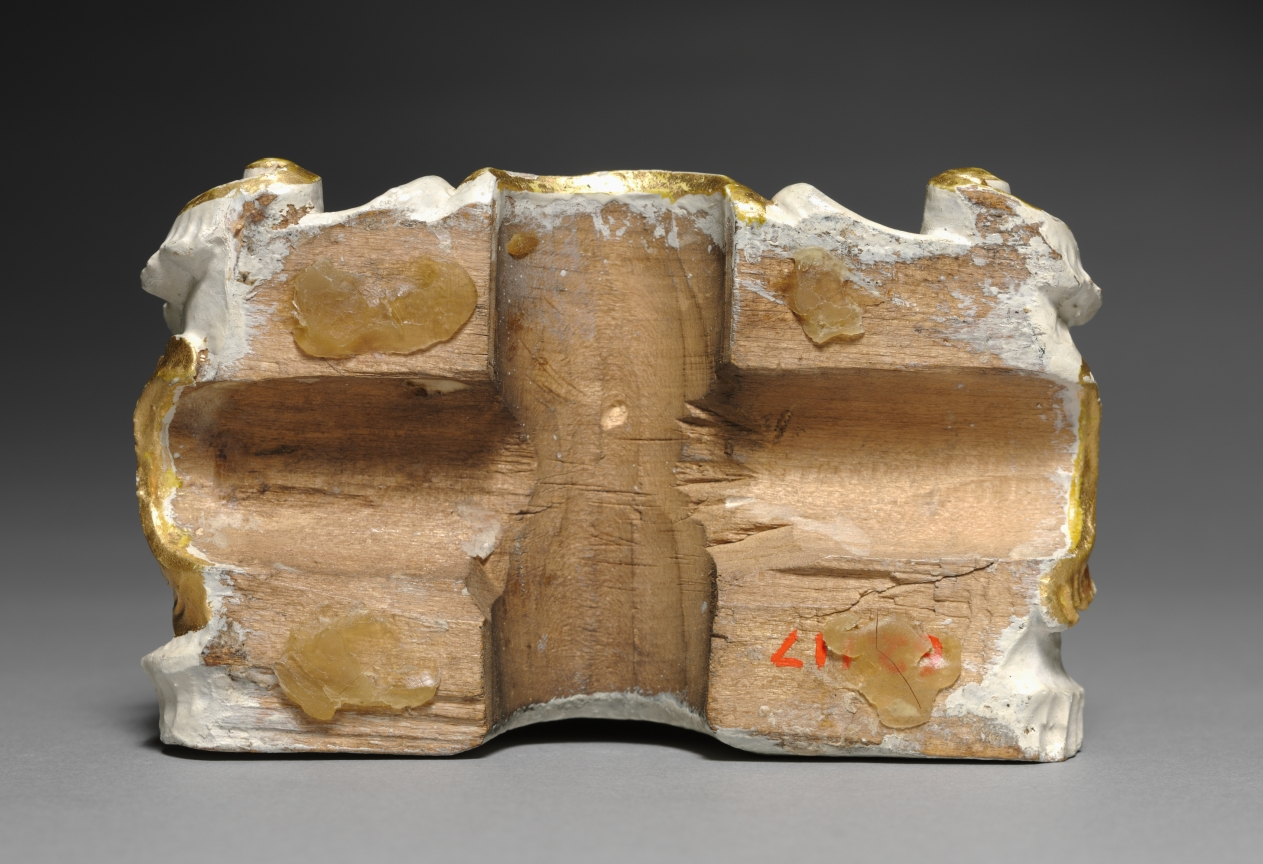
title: Bishop Saint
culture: Germany, 18th century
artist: attributed to Ferdinand Tietz (Austrian, 1708–1777)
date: c. 1740–1750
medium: painted and gilded wood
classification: Sculpture